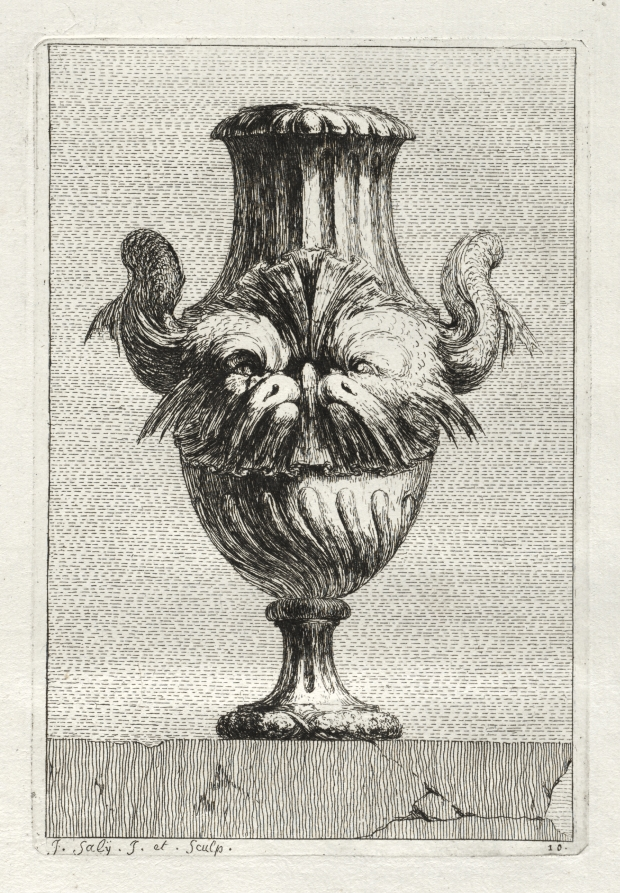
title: Suite of Vases: Plate 10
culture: France, 18th century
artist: Jacques François Saly (French, 1717–1776)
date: 1746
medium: etching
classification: Print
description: Designing ornamental vases or urns was particularly popular during the mid-18th century since the only limit to the possibilities was the imagination of the artist. Saly, a sculptor by training, was a student at the French Academy in Rome from 1740 to 1746, at which time he published a set of 30 etchings. Saly began with basic antique vase forms but deviated from classical ornament to use a rich variety of fantastic creatures for embellishment.